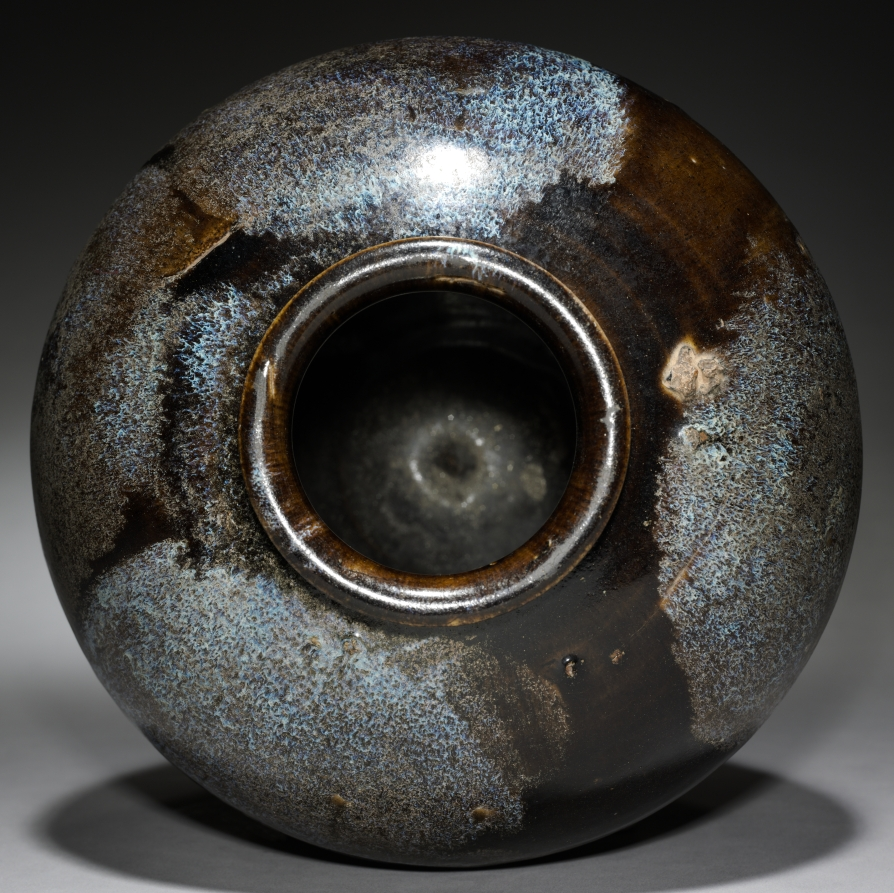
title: Jar: Black Ware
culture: China, Henan province, Huangdao kilns, Tang dynasty (618-907)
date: 700s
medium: glazed stoneware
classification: Ceramic